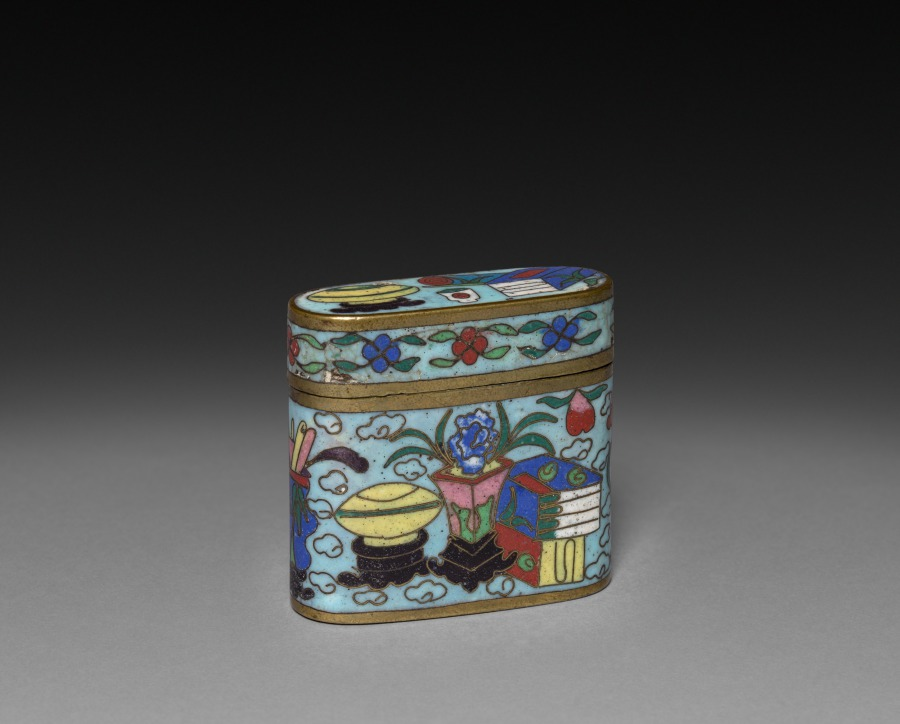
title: Box with Scholar's Accoutrements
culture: Japan, Meiji period (1868–1912)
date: late 1800s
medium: cloisonne enamel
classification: Enamel